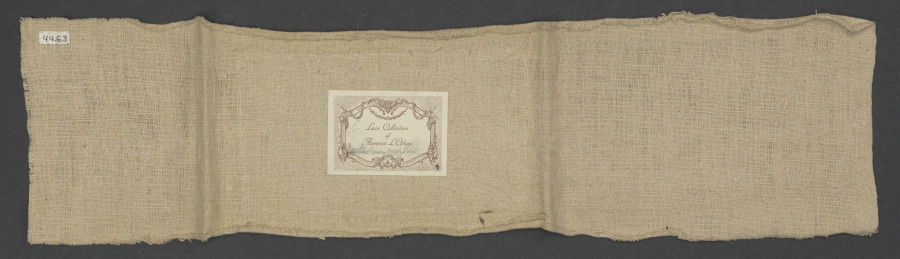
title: Pattern for lace with small section of lace worked on It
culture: Italy, Venice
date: 1600s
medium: Paper and linen?: lace pattern on paper with small section of needle lace (Venetian flat point) worked on It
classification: Lace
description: In this object, Venetian Flat Point needle lace is worked on a small section of the green card, which is in turn attached to a piece of coarse, plain weave linen. On the back of the linen is a paper label, indicating that at one time this object was in the collection of Florence L. Cohen.